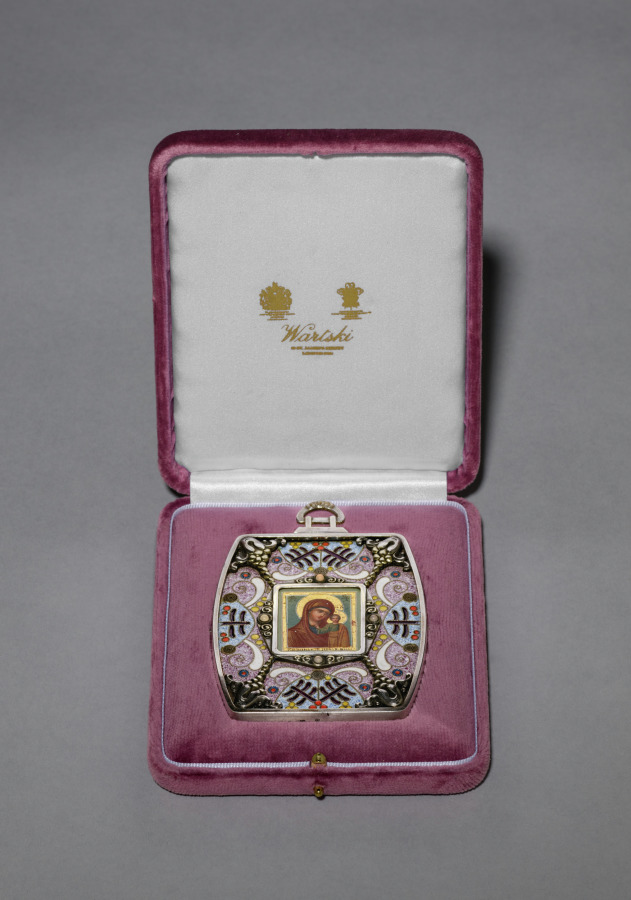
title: Pendant Icon of Our Lady of Kazan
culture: Russia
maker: House of Fabergé (Russian, 1842–1918)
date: 1915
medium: silver, enamel, glass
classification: Silver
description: One of the most revered icons in the Russian Orthodox church, Our Lady of Kazan represents the Virgin Mary as the patroness of the city of Kazan and the Holy Protectress of Russia. Fabergé embellished this icon with cloisonné (partitioned) enamel in a striking palette, as well as beaded ornaments and spiral motifs in the pan-Slavic/Neo-Russian style.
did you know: Similar to the Arts and Crafts movements, the pan-Slavic/Neo-Russian style turned to earlier handicraft traditions for inspiration.